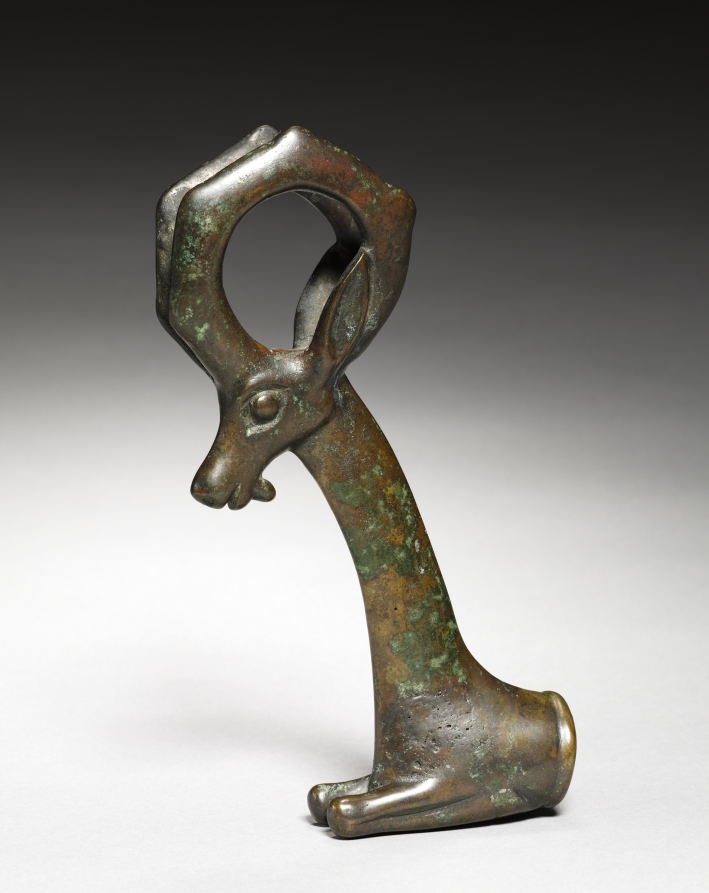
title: Ibex Whetstone Handle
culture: Iran, Luristan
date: 1100–900 BCE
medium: bronze, cast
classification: Sculpture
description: For millennia, whetstones have been used for sharpening various kinds of metal blades. They were particularly important in Luristan, a center that produced bronze blades.